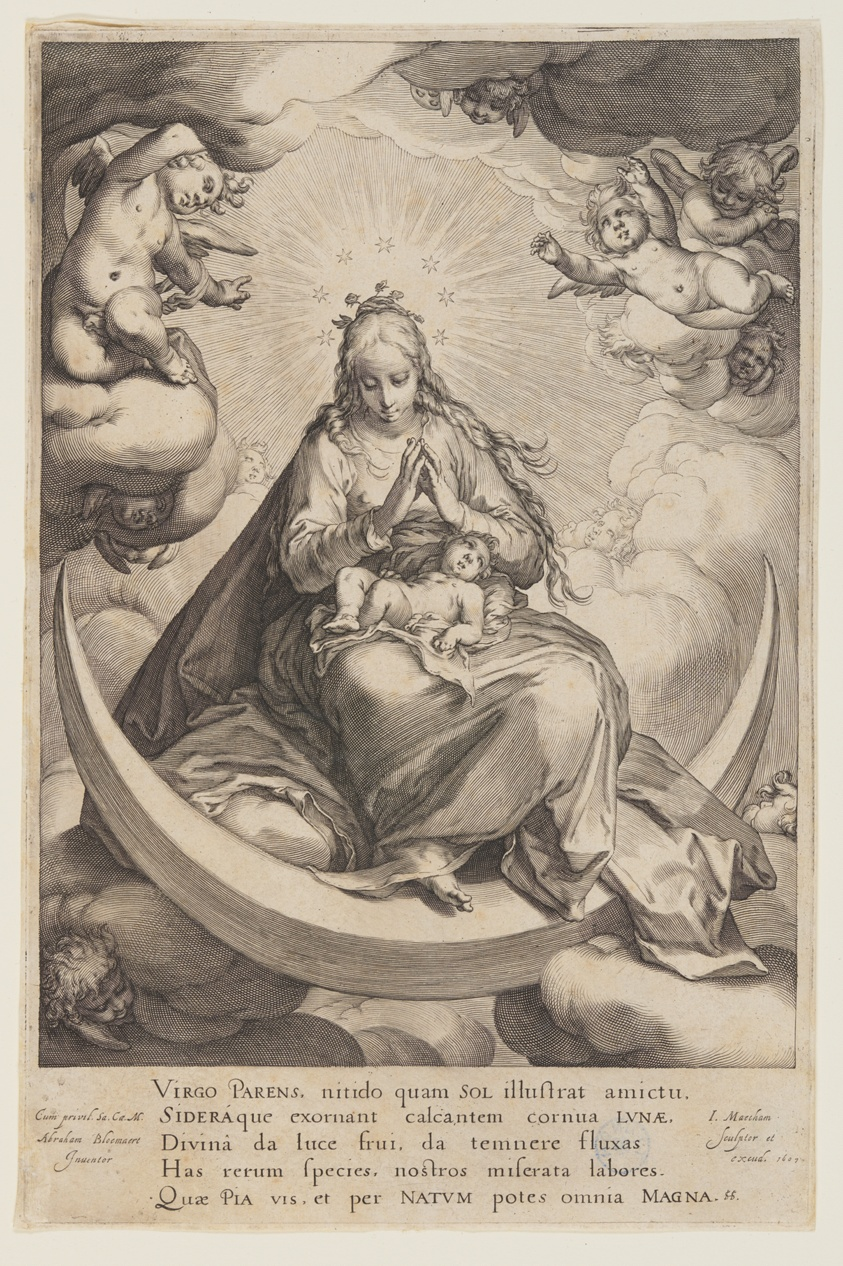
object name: Print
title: The Virgin and the Child on the Crescent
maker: Jacob Matham (Dutch, 1571–1631); after Abraham Bloemaert (Dutch, 1566–1651)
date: 1607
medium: Engraving on ivory laid paper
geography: Netherlands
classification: print; paper; prints and drawing; engraving